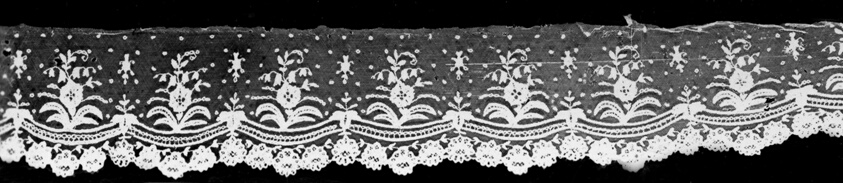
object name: Textile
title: Flounce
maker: Belgium, Brussels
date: 1860s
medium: Cotton, needle lace of a type known as "Point de Gaze" applied to machine made net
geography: Brussels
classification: textile; lace - mixed